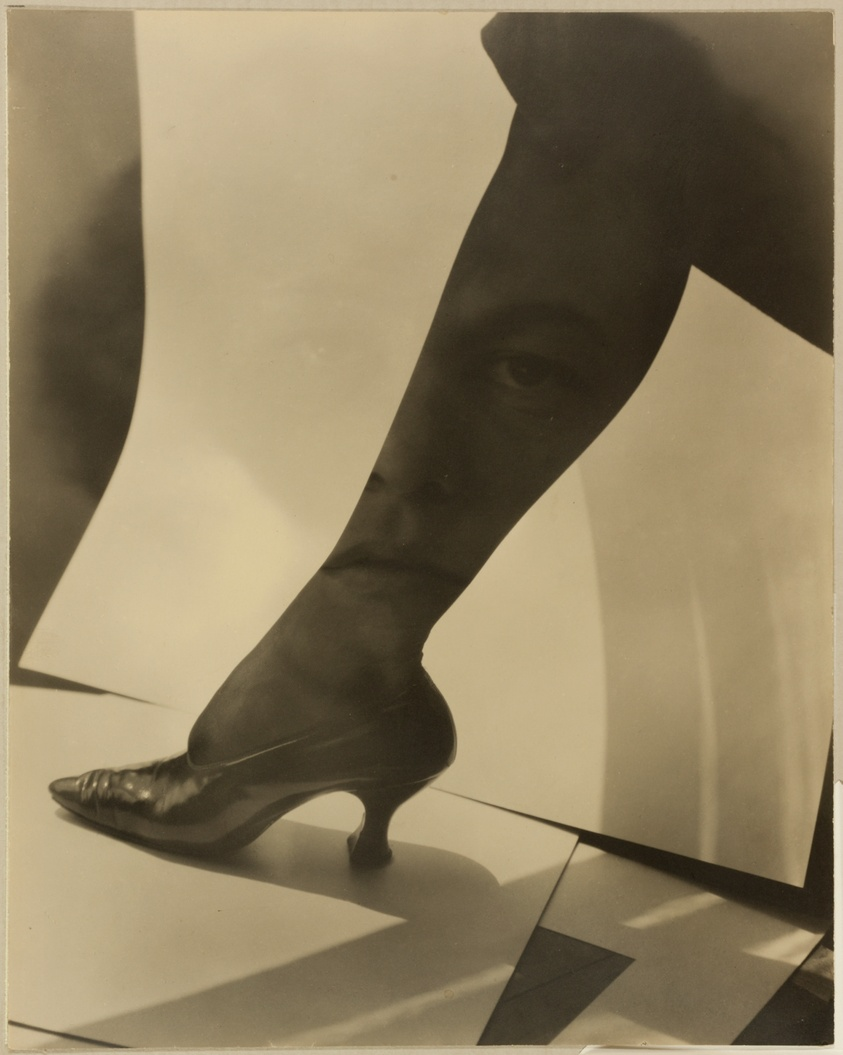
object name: Photograph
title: Dorothy True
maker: Alfred Stieglitz (American, 1864–1946)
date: 1919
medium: Gelatin silver print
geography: United States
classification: gelatin silver (developing-out-paper) pr; photographic process; photography; photograph